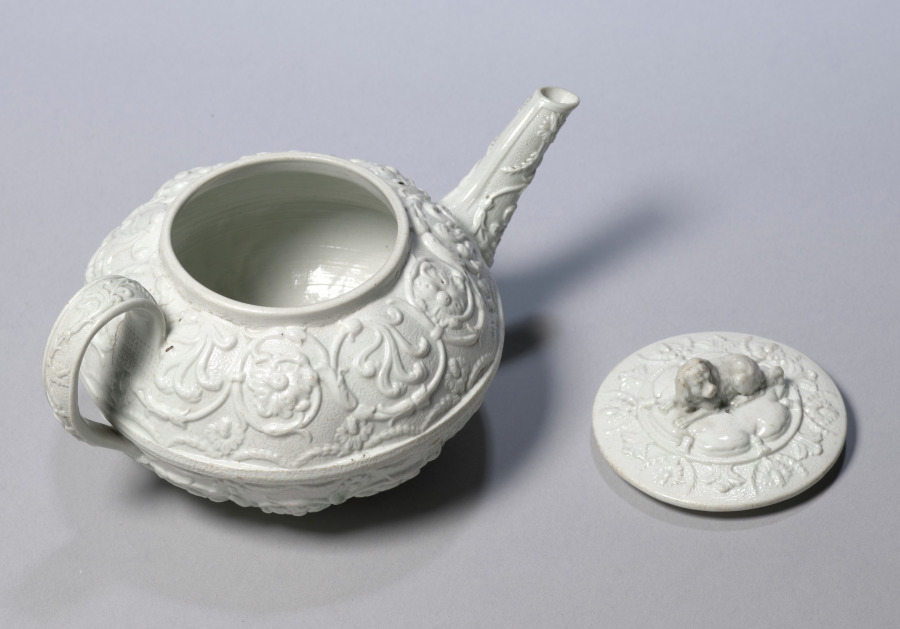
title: Teapot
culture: England, Staffordshire, 19th century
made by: Wedgwood Factory (British)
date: c. 1830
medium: stoneware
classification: Ceramic